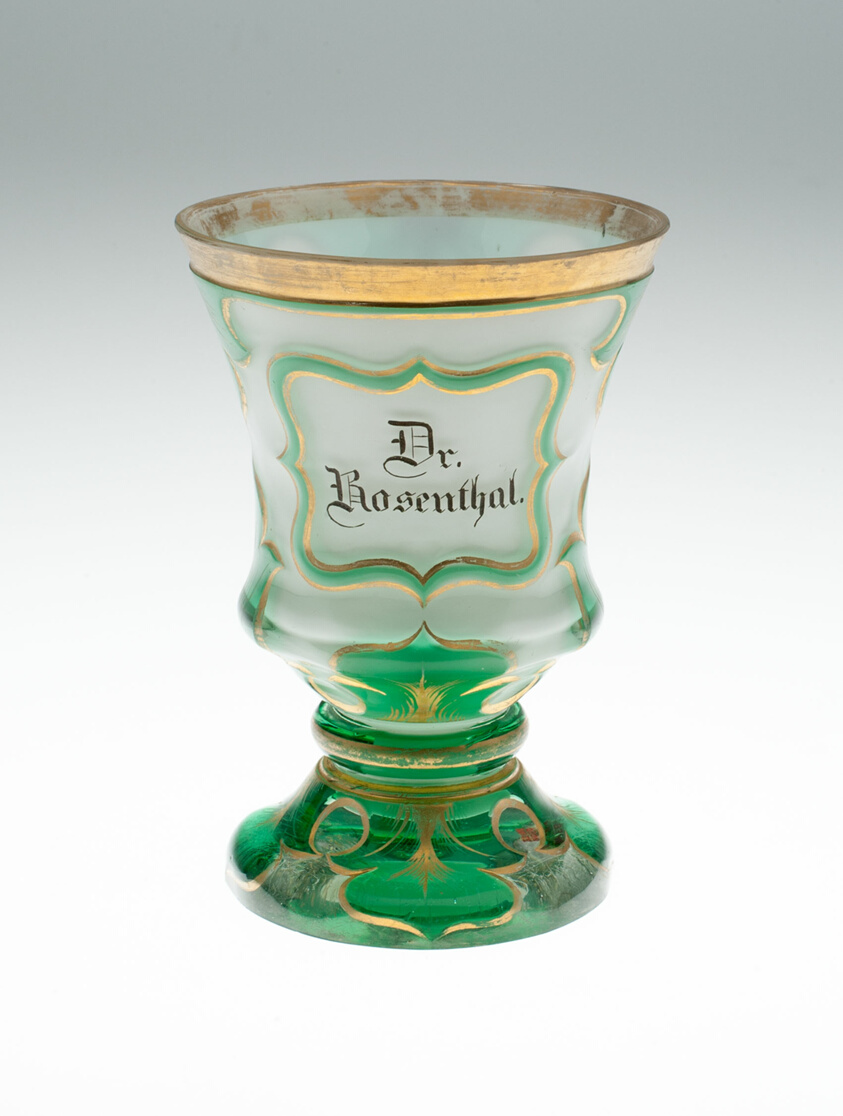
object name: Glass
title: Beaker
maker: Bohemia, Czech Republic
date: c. 1840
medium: Glass; colorless, blown, cut, overlaid with opaque green glass, black enamel and gilding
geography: Bohemia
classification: drinking vessel; glass; european decorative arts